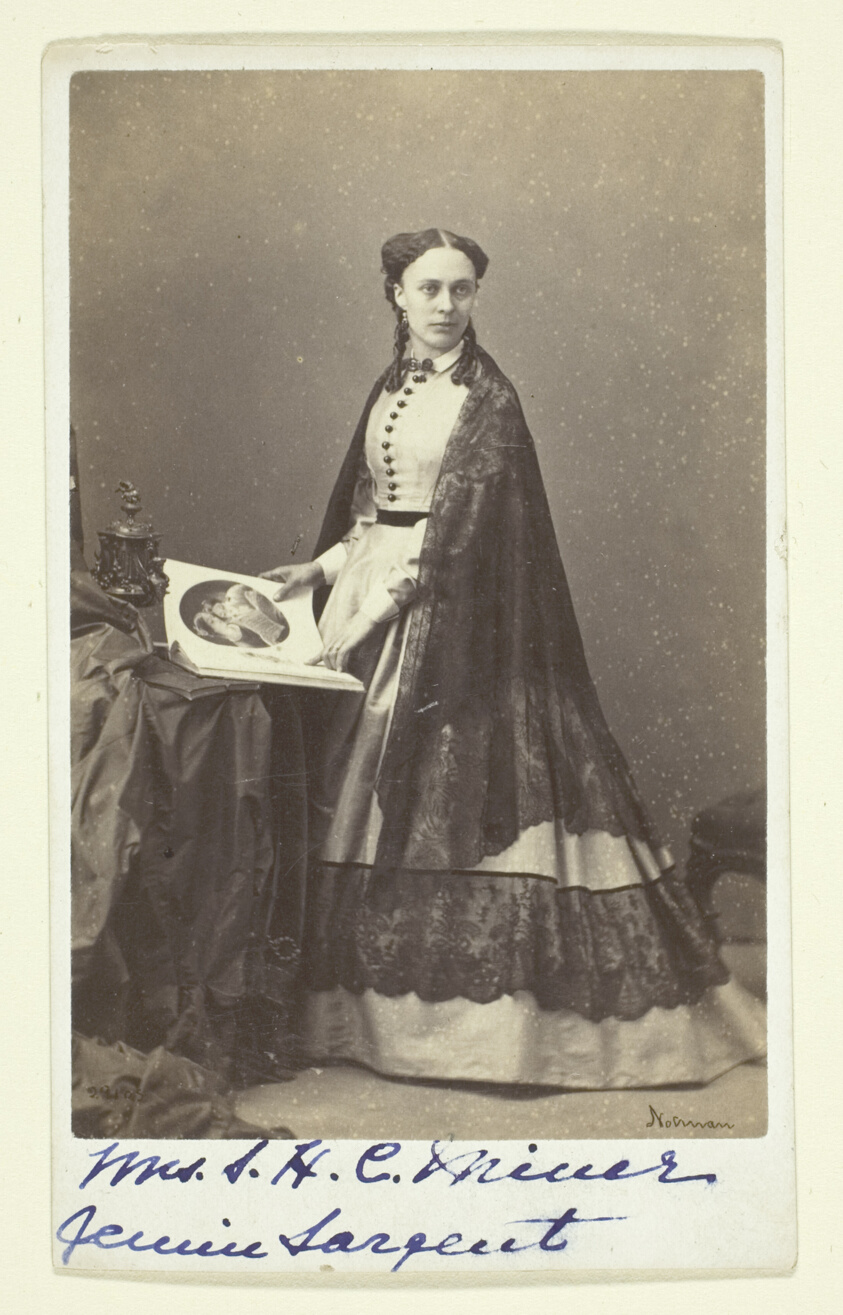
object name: Photograph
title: Mrs. S. H. C. Miner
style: 19th century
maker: William Notman (Canadian, born Scotland, 1826–1891)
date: 1846/1891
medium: Albumen print (carte-de-visite)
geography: Canada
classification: carte-de-visite (albumen); albumen silver print; photographic process; photography; photograph; card photographs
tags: Collected by Hugh Edwards, portraits